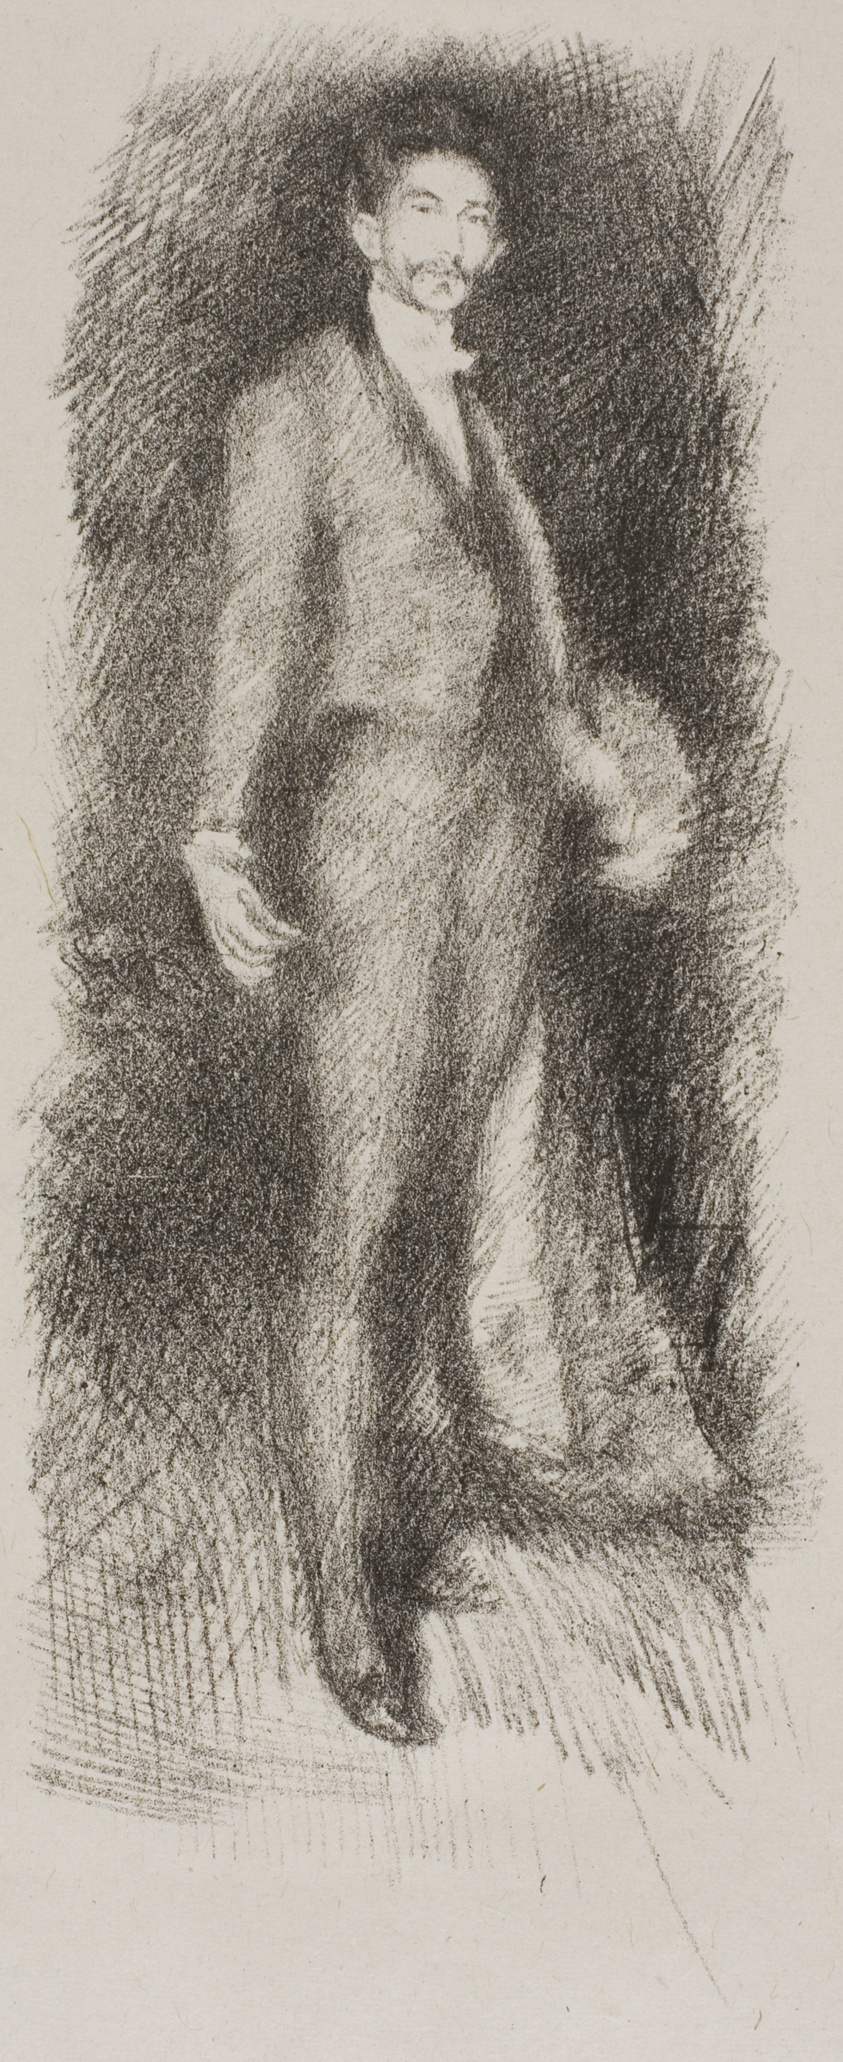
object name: Print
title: Count Robert de Montesquiou, No. 2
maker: James McNeill Whistler (American, 1834-1903)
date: 1894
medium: Transfer lithograph in black with scraping, on grayish ivory China paper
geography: United States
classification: transfer lithograph; lithograph; print; prints and drawing; paper